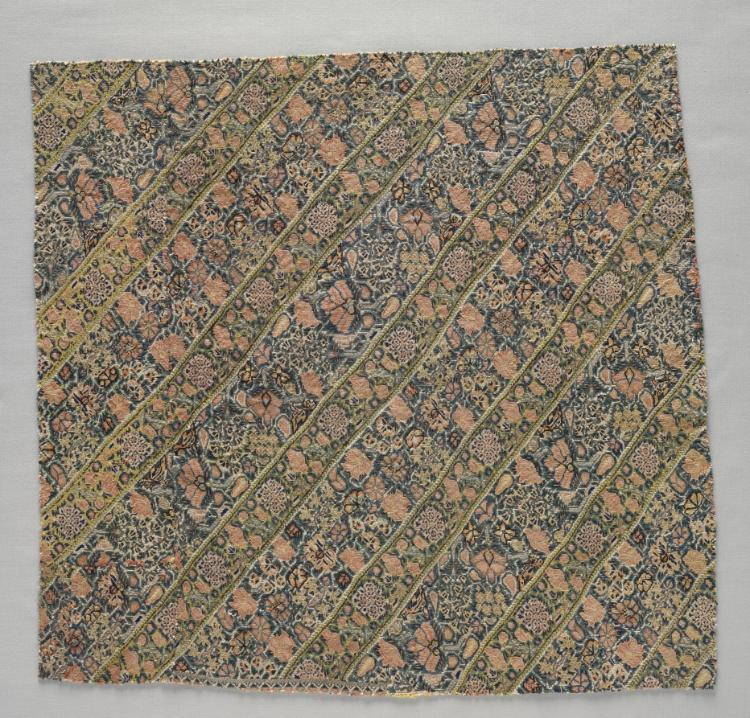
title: Fragment of a "Nakshe" (Woman's Trousering)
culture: Iran, 18th century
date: 1700s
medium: embroidery, silk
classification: Embroidery